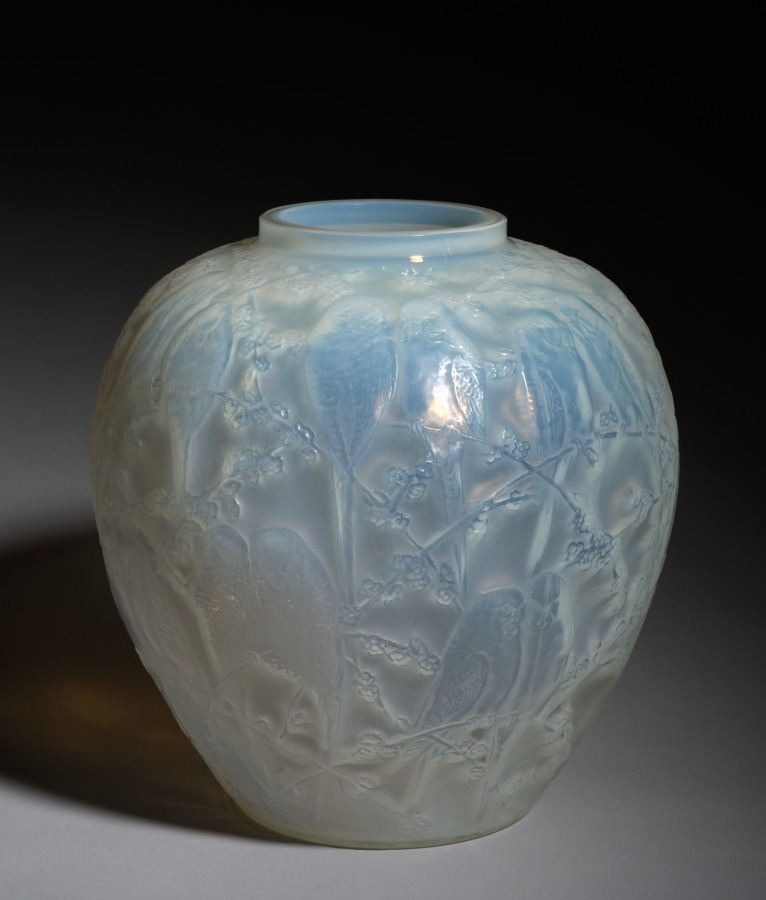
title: Vase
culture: France, 20th century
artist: firm of René Lalique (French, 1860–1945)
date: c. 1930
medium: glass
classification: Glass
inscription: signature from mold on bottom: "R. LALIQUE"; etched on bottom: "FRANCE" and "11594."